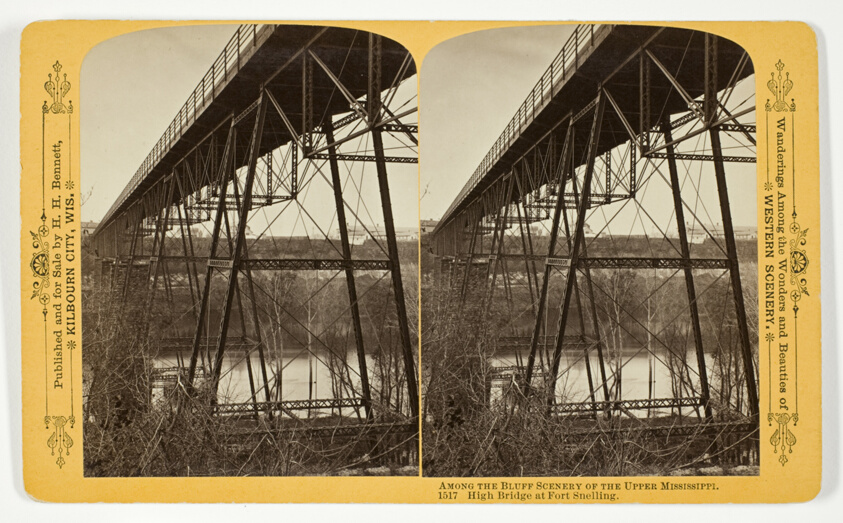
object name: Photograph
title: High Bridge at Fort Snelling, No. 1517 from the series "Among the Bluff Scenery of the Upper Mississippi"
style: 19th century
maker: Henry Hamilton Bennett (American, born Canada, 1843-1908)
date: 1870/1908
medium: Albumen print, stereo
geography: Wisconsin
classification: photography; photograph; albumen silver print; stereograph (albumen)